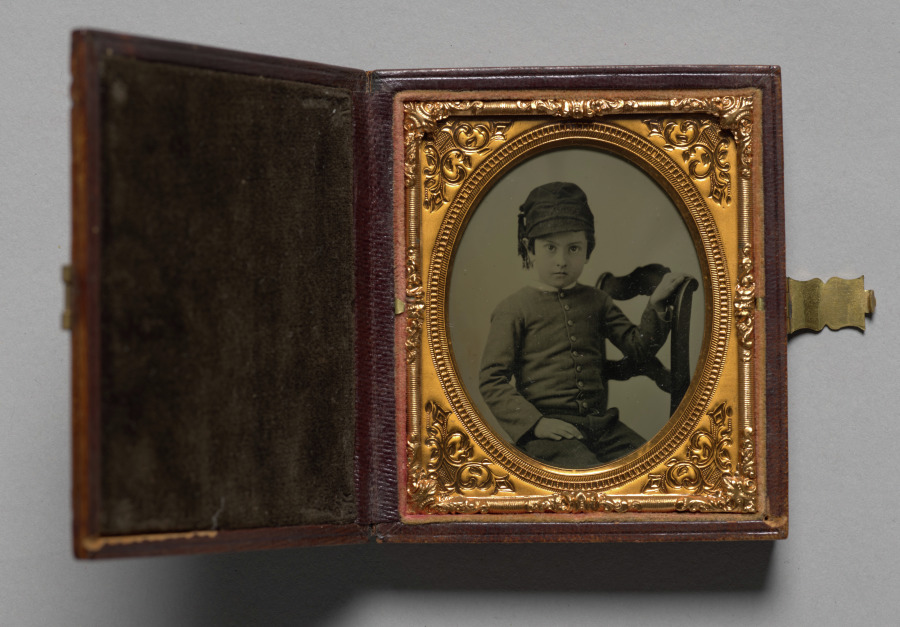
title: Seated boy in tasseled cap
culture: America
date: c. 1858–61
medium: ambrotype, sixth plate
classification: Photograph